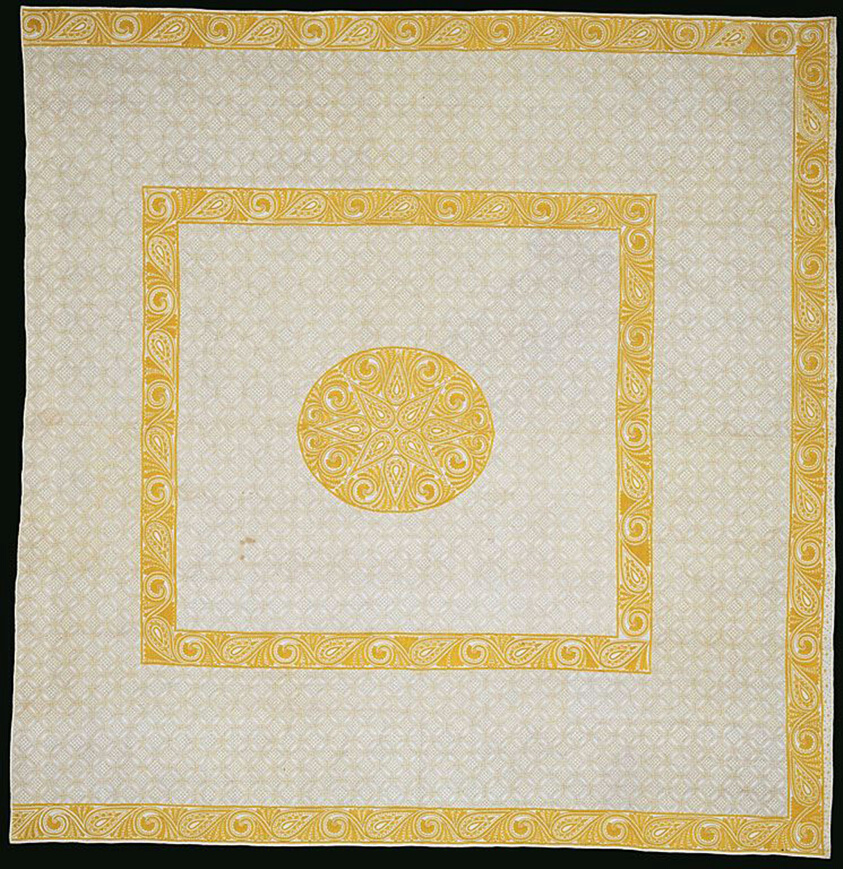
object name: Textile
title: Bedcover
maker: Made by the great-great grandmother, Jane Bolas Vaughan, or great-great-great grandmother, Elizabeth Ottiwell Vaughan, of Edward Goldisborough Chambre Vaughan, 1834–1914; England, Shropshire, Lobbington, Ellesmere, Burlton Hall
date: late 17th/early 18th century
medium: Linen, plain weave; underlaid with cotton, plain weave; embroidered with silk in back, chain, open chain, leaf, Roman, Roumanian, satin and stem stitches; edged with linen, plain weave tape; two loom widths joined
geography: Shropshire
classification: textile; needlework (visual works)